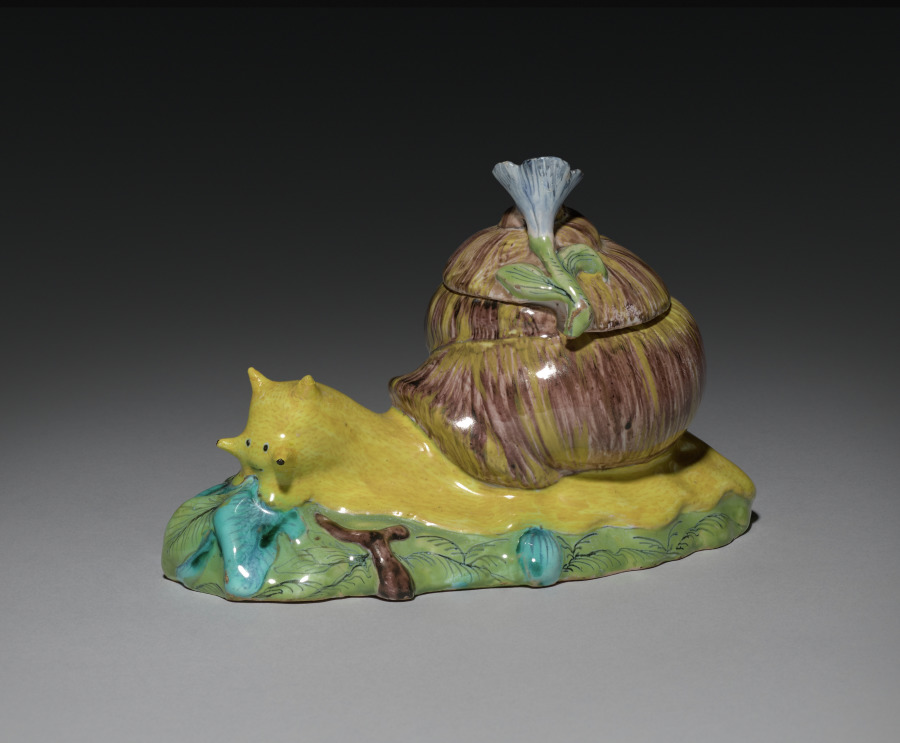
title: Covered Box in the Form of a Snail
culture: France, 18th century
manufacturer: Strasbourg Factory (France)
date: c. 1750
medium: faience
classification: Ceramic